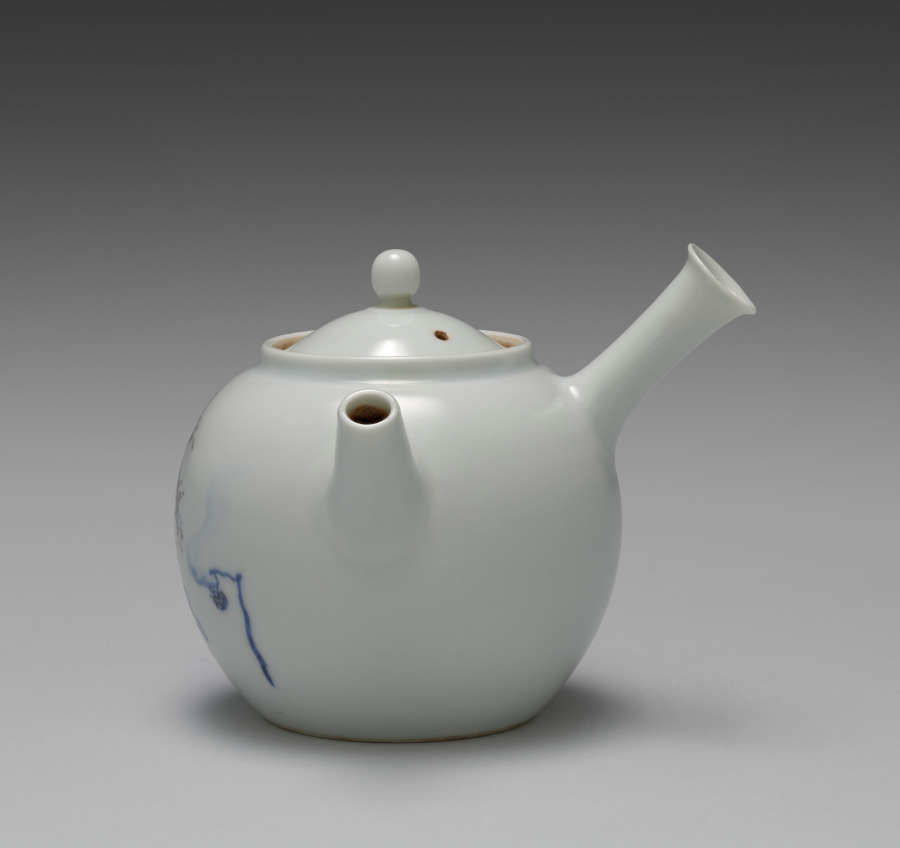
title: Teapot with Cherry at Night in Gion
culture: Japan, Meiji period (1868–1912)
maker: Seifū Yohei III (Japanese, 1851–1914)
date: 1893–1914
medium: Porcelain with underglaze blue and iron oxide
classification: Ceramic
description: This side-handled sencha teapot with the cherry tree has a nearly spherical shape, and its recessed lid has an ovoid knob. It has both blue and a purplish brown under the glaze for the blossoms and embers on one side, and the vertical calligraphy identifies the tree as a cherry tree at night in the Gion area of Kyoto. To the right of the tree, smoke billows from a small lantern fire in a basket suspended on a post. In terms of collecting history, a paper inserted into the box of Teapot with Cherry at Night in Gion is of interest. It is a flyer for Yamamoto Shōseidō, a shop (no longer extant) that sold fine Kyoto ceramics in Osaka.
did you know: This teapot features the Japanese theme of a blossoming cherry tree in the Gion area of Kyoto in underglaze blue and brown.